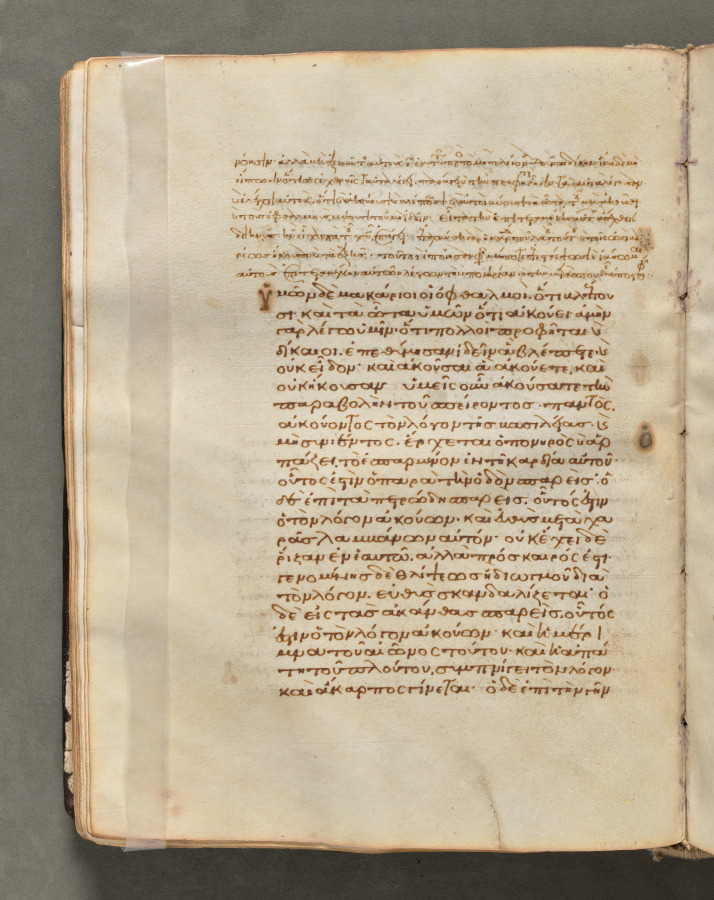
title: Text, folio 58 (verso), from a Gospel Book with Commentaries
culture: Byzantium, Constantinople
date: c. 1000–1100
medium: ink, tempera, and gold on vellum; leather binding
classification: Bound Volume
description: Each of the four gospels in this book opens on a page with brilliantly illuminated borders depicting the author of the text as well as birds-principally peacocks, symbols of the immortality of the soul-and fountains, representing the fountain of life and the salvation of the soul. This volume consists of 428 leaves with texts in Greek. Its level of sophistication suggests that it was probably written and decorated in a monastery in Constantinople.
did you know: Gospel Books were carried in procession through Byzantine churches.